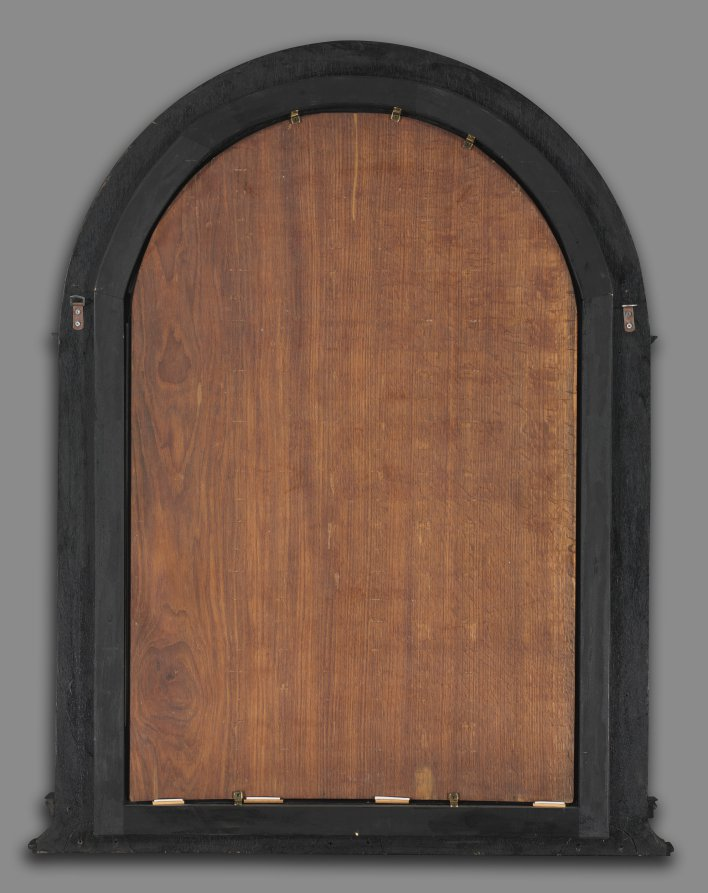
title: The Trinity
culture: Flanders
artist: Hendrik van Balen (Flemish, 1575–1632)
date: c. 1620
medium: oil on wood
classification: Painting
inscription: signed lower left: H.V. Balen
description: This vividly colored altarpiece was made in Antwerp, the center of religious learning in Catholic Flanders. In the mid-1500s when the Catholic Church mounted a defense against the spread of Protestant reforms, known as the Counter-Reformation, it encouraged the production of religious images that promoted Catholic doctrine, offering opportunities for artists like Rubens, Van Dyck, and Van Balen. Van Balen’s painting depicts the traditional theme of the Trinity, with God the Father holding the dead Christ and the dove of the Holy Spirit hovering above. Unusually, God wears the purple papal tiara, intended to emphasize the pope’s role as God’s true representative on earth. Encircling the figures of the Trinity are angels holding the instruments of Christ’s Passion. On the clasp of God’s elaborate cape is a small figure of Saint Barbara, perhaps a clue to the original location of the work in a chapel dedicated to her.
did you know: The crown worn by God in this painting resembles a papal tiara, last used by a Catholic pope in 1964.